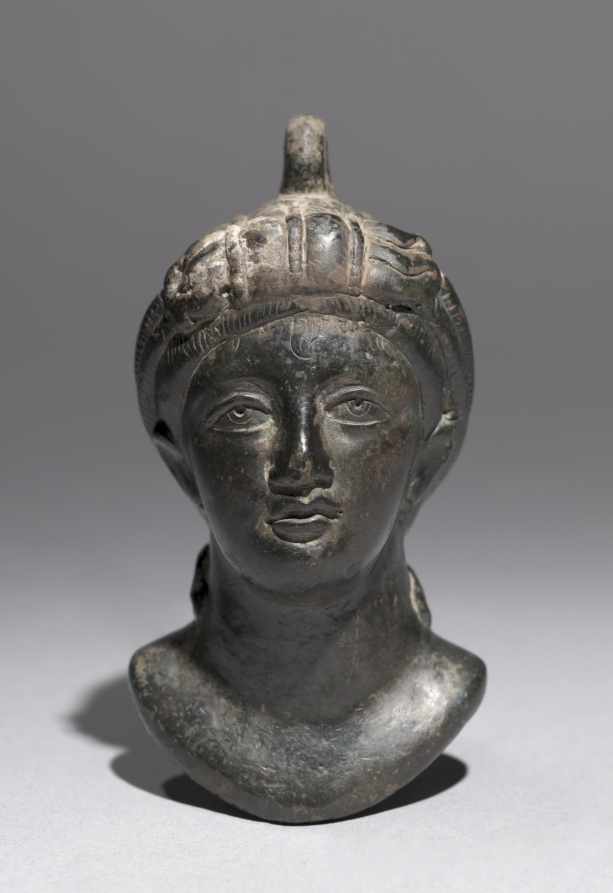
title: Balance Weight formed as the Bust of an Empress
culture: Roman, Augustan period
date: 27 BCE–14 CE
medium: bronze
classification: Metalwork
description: Among the most striking Byzantine weights to have survived are the imperial weights issued in the late 4th and 5th centuries. Typically they depict the same royal figures seen on coins to promote the legitimacy and stability of the state and to guarantee their validity as "honest weights." Used on balance scales, the weights were sometimes filled with lead to make them heavier.